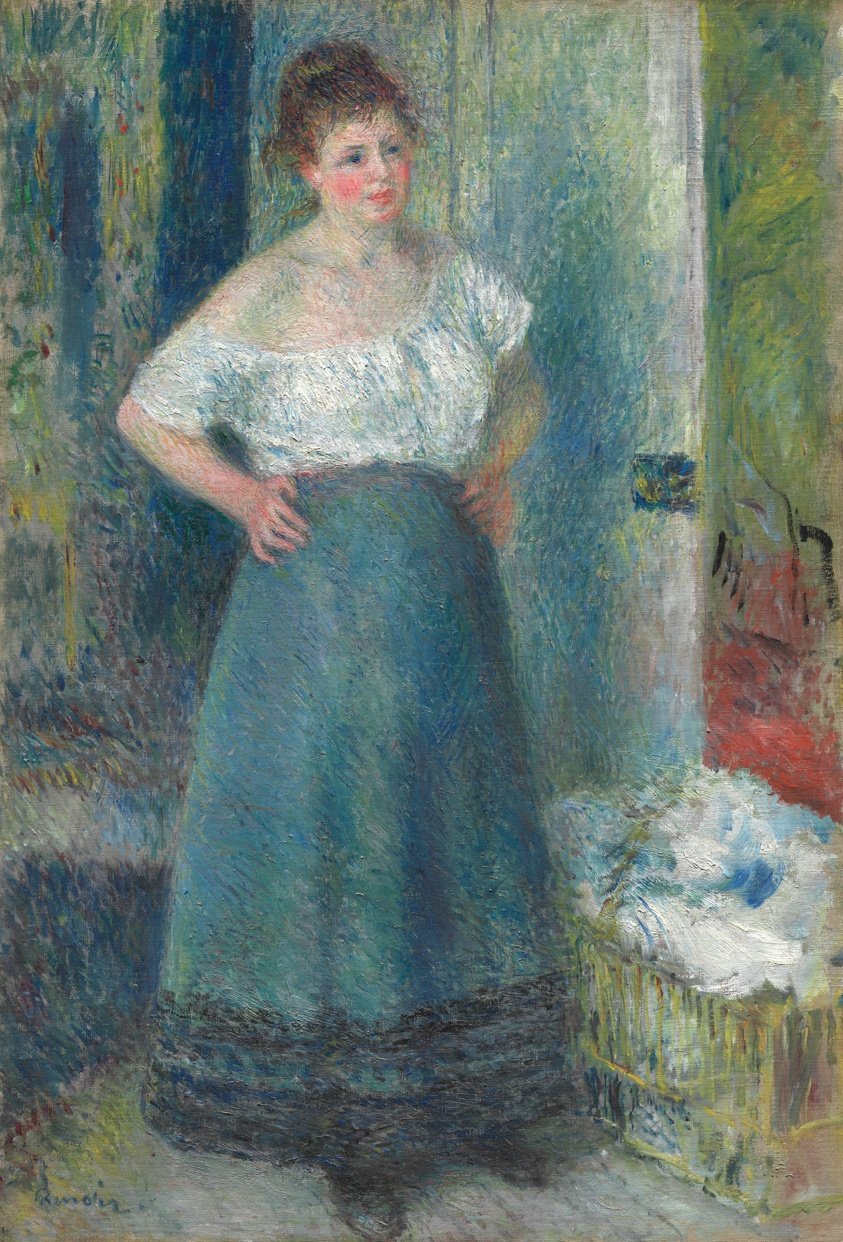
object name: Painting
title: The Laundress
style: Impressionism, nineteenth century, 19th century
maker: Pierre-Auguste Renoir (French, 1841–1919)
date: 1877–79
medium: Oil on canvas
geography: France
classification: painting; portrait; paint; oil paintings (visual works); oil on canvas; french; european painting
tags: women, portrait, portraits: female subject, labor, interior, basket, textile, woman, work, portraits